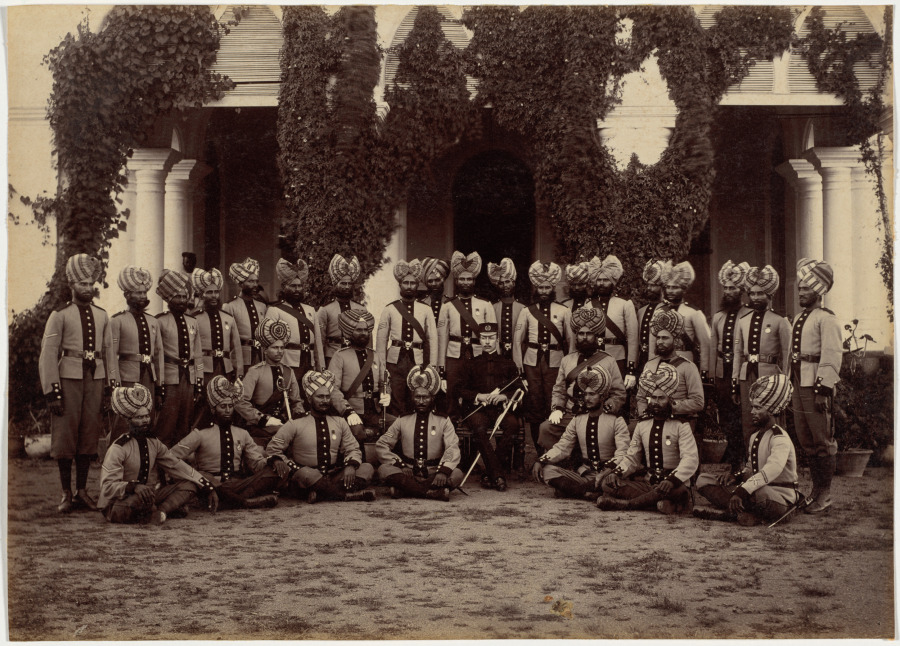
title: Detachment of Bhopal Battalion at Indore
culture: India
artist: Raja Deen Dayal (Indian, 1844–1905)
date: 1886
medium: albumen print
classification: Photograph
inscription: No visible inscriptions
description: In state and military portraits, people seated in chairs and in the middle are generally of the highest rank. Amid these Indian soldiers sits a lone British officer. The Bhopal Battalion had seen combat just six years earlier during the Second Anglo-Afghan War, helping to keep Afghanistan a British-friendly buffer against Russia’s desire to expand into India. This detachment includes a number of Sikhs, identifiable by their neatly trimmed beards and turbans that cover their ears. Members of that religious group were avidly recruited by the British Indian Army due to their reputed ferocity and courage in battle.